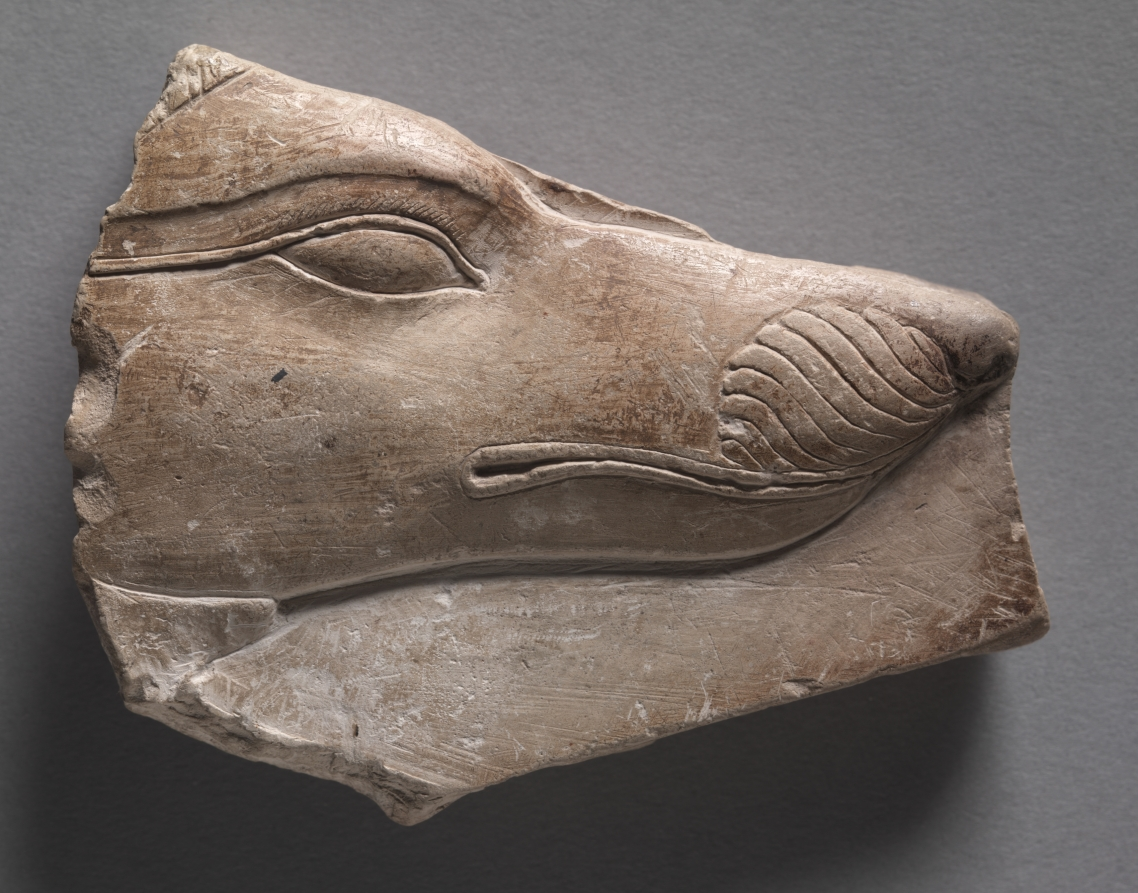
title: Double-Sided Votive Relief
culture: Egypt, Greco-Roman period (332 BCE–395 CE), Ptolemaic dynasty (305–30 BCE)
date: 305–30 BCE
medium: limestone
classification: Sculpture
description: Trial pieces—carved on limestone flakes, or ostraca—and sculptors' models allow us to see how the ancient Egyptian artist approached his work. The four heads—a king, a shaven-headed priest, and two foreigners—on this large trial piece were doubtless practice sketches but nonetheless show the learner's keen eye for detail and for distinguishing different facial types. Others, such as the wild dog's head and the profile of a king in relief, are masterpieces in their own right, and were probably meant to be copied. The sculpture of a lion was left unfinished, which makes it even more intriguing; even in its roughed-out-state it is a majestic figure. The back of this piece is carved in the figure of a goddess.